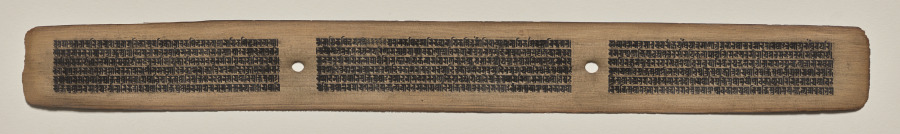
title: Text, Folio 58 (recto), from a Manuscript of the Perfection of Wisdom in Eight Thousand Lines (Ashtasahasrika Prajnaparamita-sutra)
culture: Eastern India, Bihar, Vikramashila Monastery. Painting: Nepal, Kathmandu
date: Sunday, September 14, 1119 (year 239 of the Newar Samvat in the month of Ashvina)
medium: gum tempera and ink on palm leaves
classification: Painting